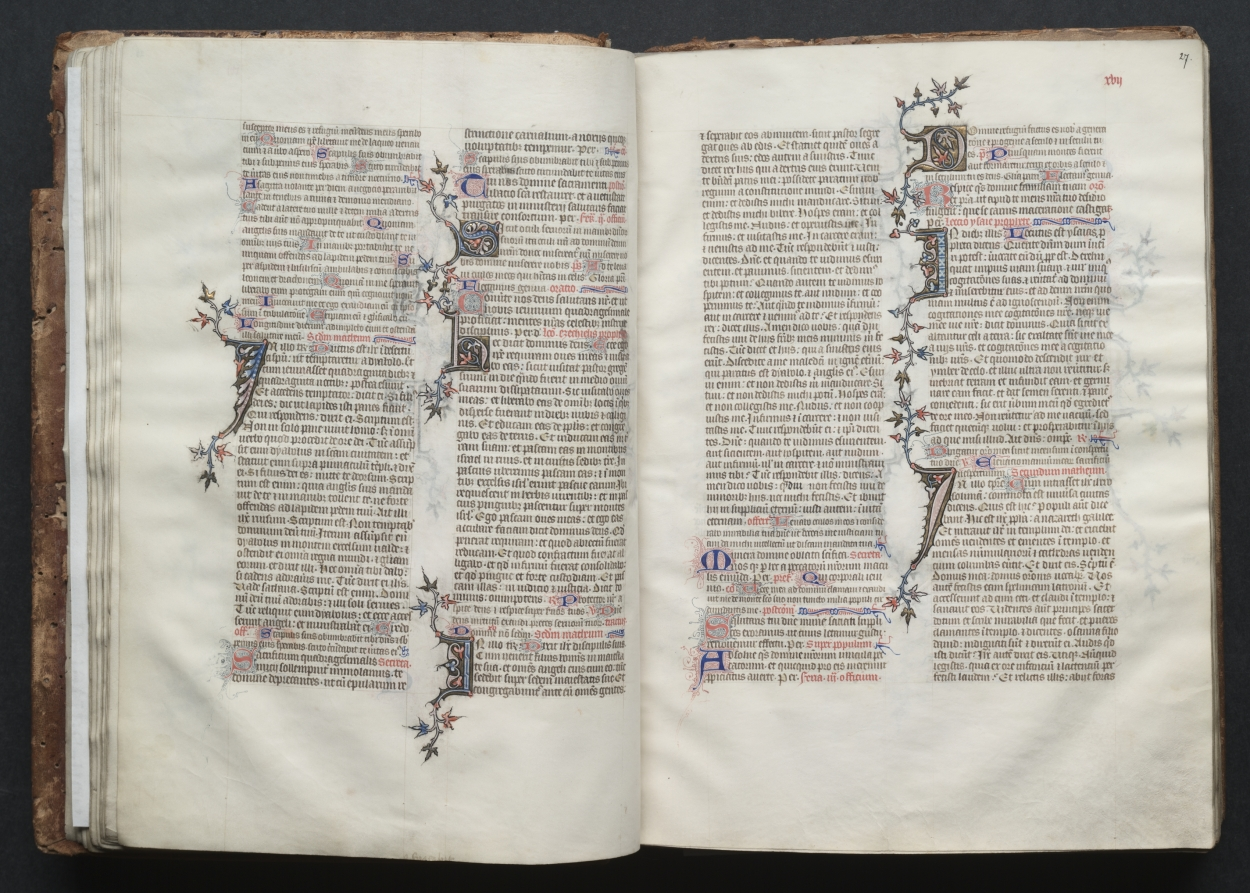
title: The Gotha Missal: Fol. 27r, Text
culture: France, Paris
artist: Master of the Boqueteaux (French)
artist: and Workshop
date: c. 1375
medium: ink, tempera, and gold on vellum; blind-tooled leather binding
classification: Bound Volume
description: The style and quality of this manuscript's decoration is typical of deluxe Parisian books made for aristocratic or royal patrons. Most of the book's decoration appears to be the work of the Master of the Boqueteaux, an artist active at the court of King Charles V (died 1380). His style was apparently shared by a number of book illuminators working in and around Paris. It is very possible that the Gotha Missal belonged to Charles V, but is not provable because the manuscript has no royal portraits and lacks a colophon. Given the book's magnificent decoration, however, it would seem that it was produced for a Valois prince, if not for the king himself. The manuscript receives its name from the German dukes of Gotha, its later owners.